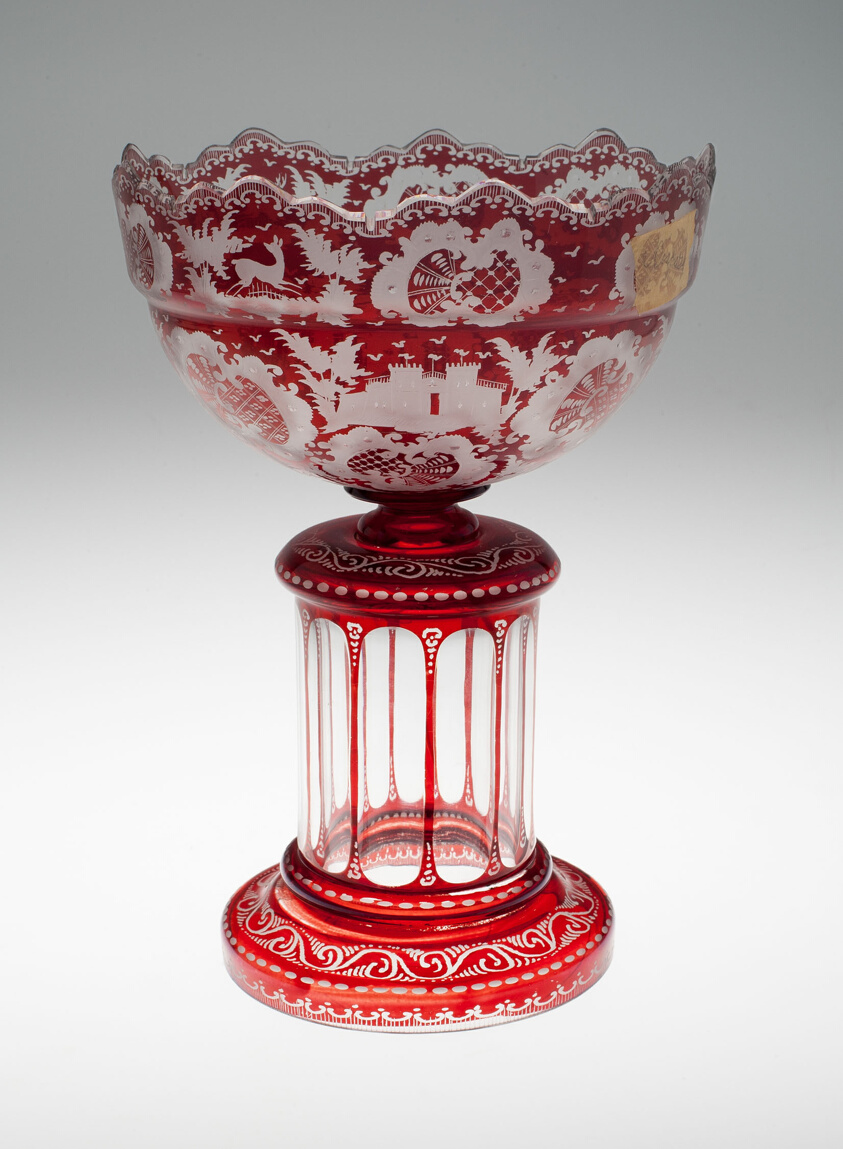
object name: Glass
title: Centerpiece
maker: Bohemia, Czech Republic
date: c. 1840/50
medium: Glass; clear, partly encased with ruby and engraved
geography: Bohemia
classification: glass; european decorative arts